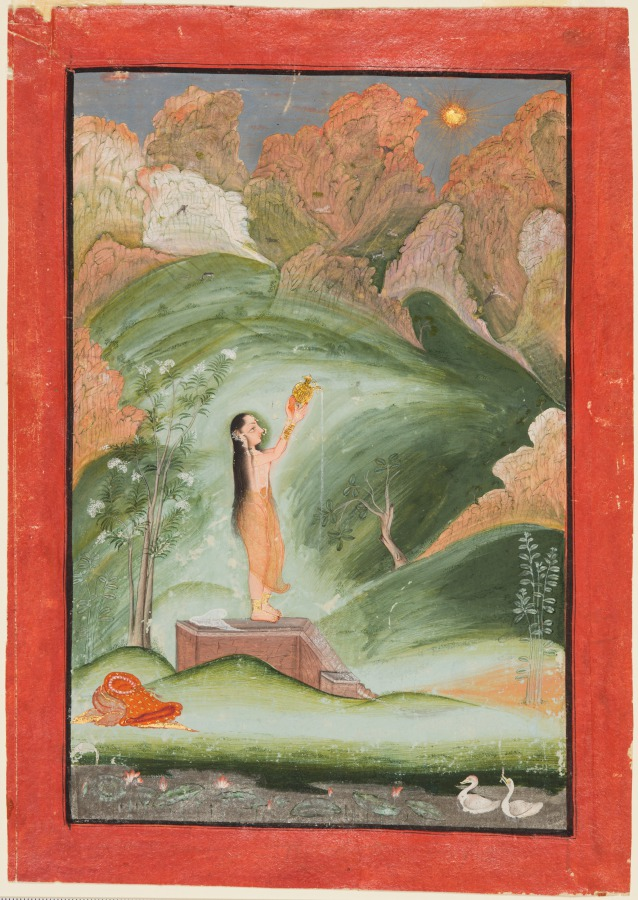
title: A girl worshipping the rising sun (Surya puja)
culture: Northwestern India, Rajasthan, Rajput Kingdom of Devgarh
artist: attributed to Chokha (Indian, active c. 1799–1824)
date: c. 1810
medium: gum tempera and gold on paper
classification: Painting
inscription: [[verso]] 659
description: Clad in only her undergarment, an adolescent girl performs a ritual of morning prayer. She pours a stream of water that splashes down the steps of the platform on which she stands, her garland and orange sari on the ground behind her. Devotional practice in India can occur in nature, in the open air, without the presence of a temple, icon, or a priest. Animals stir in the hills, and a goose has caught a fish. The artist appears to have connected the peace and bounty of the land with the pious act of honoring the sun with water.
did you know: One of the two ducks in the lotus pond has a fish in its bill.